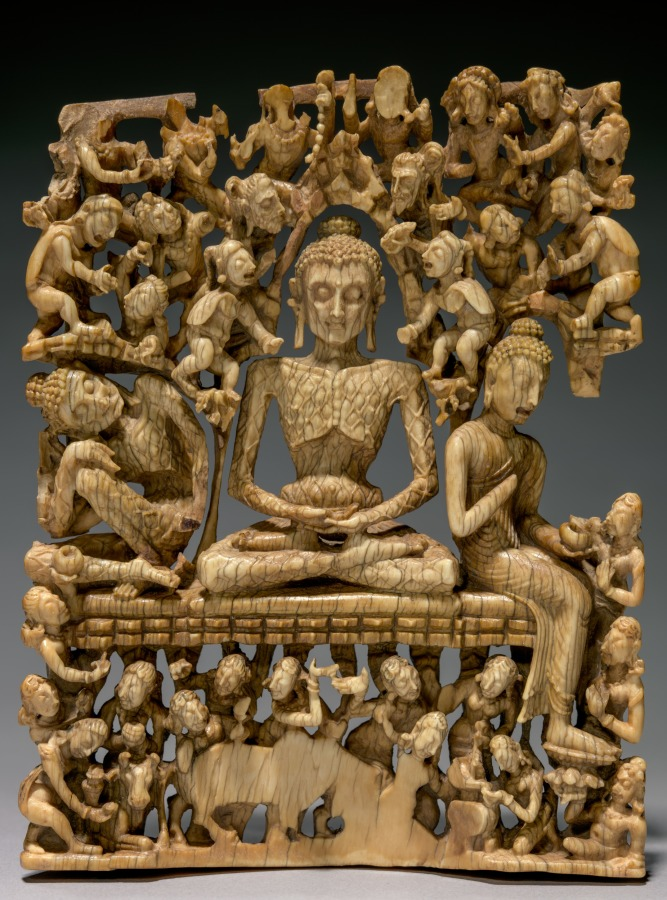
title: Fasting Buddha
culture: India, Kashmir, 8th century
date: 700s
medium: ivory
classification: Ivory